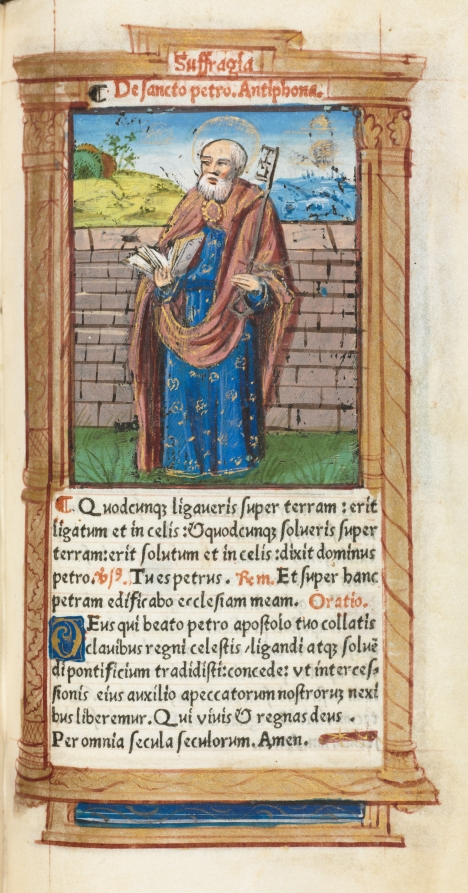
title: Printed Book of Hours (Use of Rome): fol. 99r, St. Peter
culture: France, Paris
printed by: Guillaume Le Rouge (French, Paris, active 1493–1517)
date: 1510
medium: 112 Printed folios on parchment, bound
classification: Bound Volume